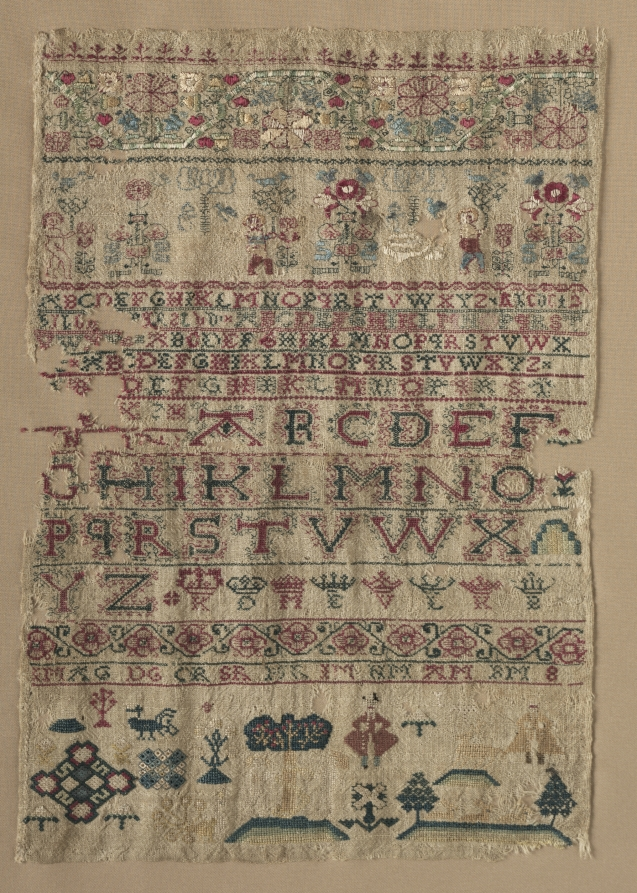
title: Sampler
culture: England, 18th century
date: 1743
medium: silkembroidery on wool (?)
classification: Sampler